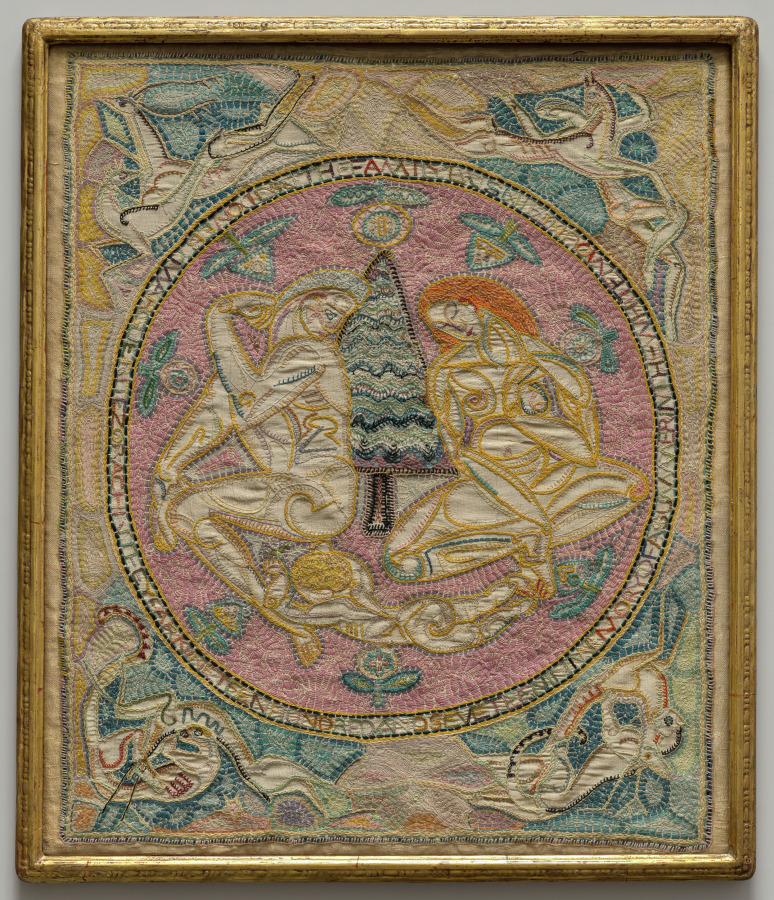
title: The Family (In Memory of a Summer in the White Mountains)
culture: America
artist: Marguerite Zorach (American, 1887–1968)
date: 1917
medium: plain weave silk; wool embroidery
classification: Embroidery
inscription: THE FAMILY / DONE BY MARGUERITE ZORACH IN THE YEAR NINETEEN HUNDRED AND SEVENTEEN IN MEMORY OF A SUMMER IN THE WHITE MOUNTAINS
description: Marguerite Zorach conceived her large, complex embroideries as major artistic statements at a time when the medium was routinely considered “craft,” as opposed to “fine art.” In doing so, she helped to erase such distinctions. One of her most acclaimed works, this example celebrates humanity in harmony with nature, presenting the artist, her husband (a Cleveland-raised sculptor named William Zorach), and their son amid an evergreen tree and four pairs of animals. Very time consuming to create, Zorach’s embroideries are rare.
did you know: In 1925, Zorach served as first president of the New York Society of Women Artists, an organization still in existence.